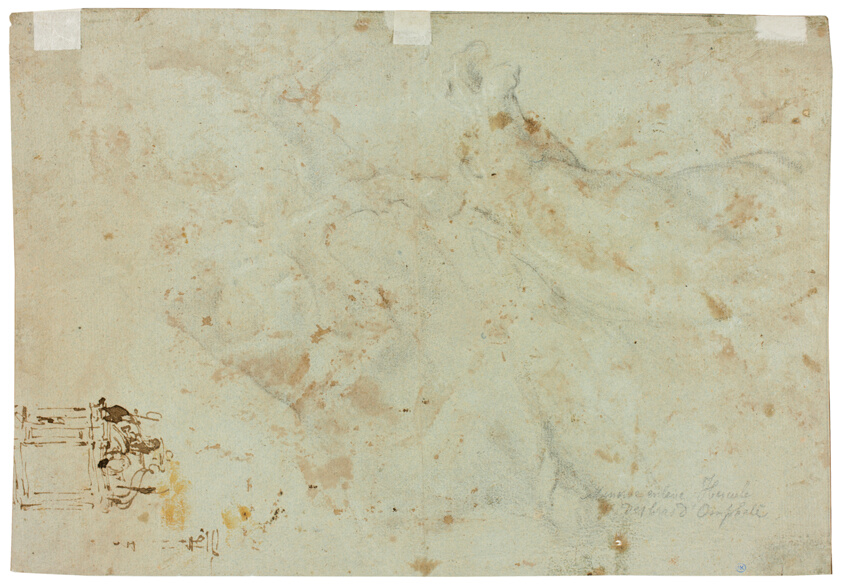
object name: Drawing and Watercolor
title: Apotheosis of Hercules (recto); Sketches of Horse's Head, Horse's Forequarters, and Altarpiece or Ciborium (verso)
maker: possibly Anton Domenico Gabbiani (Italian, 1652-1726); or Ciro Ferri (Italian, 1634-1689); or possibly after Pietro da Cortona (Italian, 1596-1669)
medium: Pen and brown ink, with brush and brown wash, heightened with white gouache, over graphite (recto), and black chlalk with pen and ink (verso), on blue-gray laid paper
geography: Italy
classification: pen and ink drawings; drawings (visual works); prints and drawing